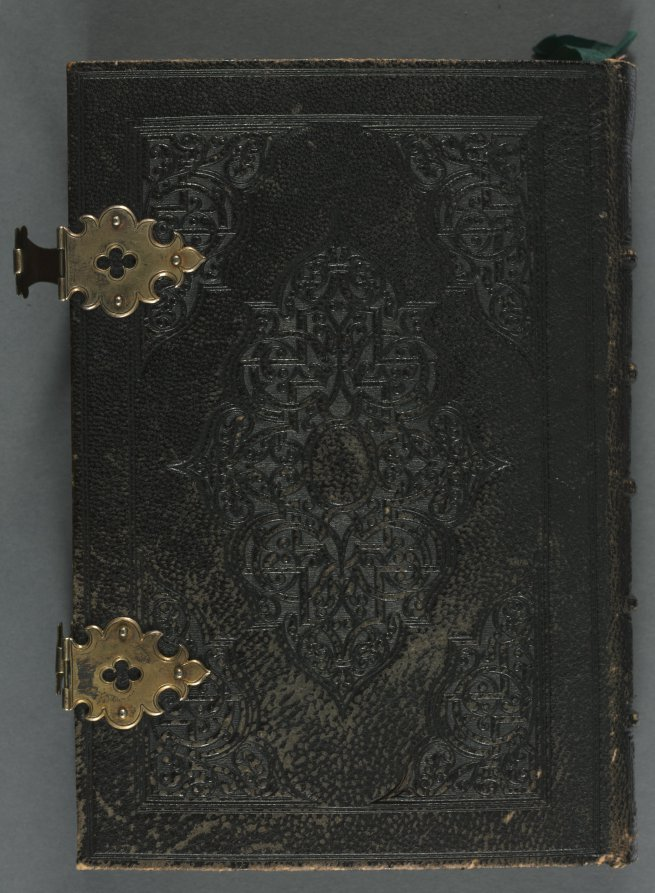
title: Book of Hours (Use of Paris)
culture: France, Paris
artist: possibly studio or workshop of The Bedford Master (French, Paris, active c. 1405–30)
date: c. 1420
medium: ink, tempera, and gold on vellum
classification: Bound Volume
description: The identity of the Bedford Master is not known. He is named for his work on two books produced for John of Lancaster, 1st Duke of Bedford, between 1415 and 1435. He was active in Paris and known to have been the head of a large and prolific workshop. The illuminator, one of the most innovative artists of his time, based his style on trends of the period around 1400.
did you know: Books of hours were the most abundantly produced book in the Middle Ages.